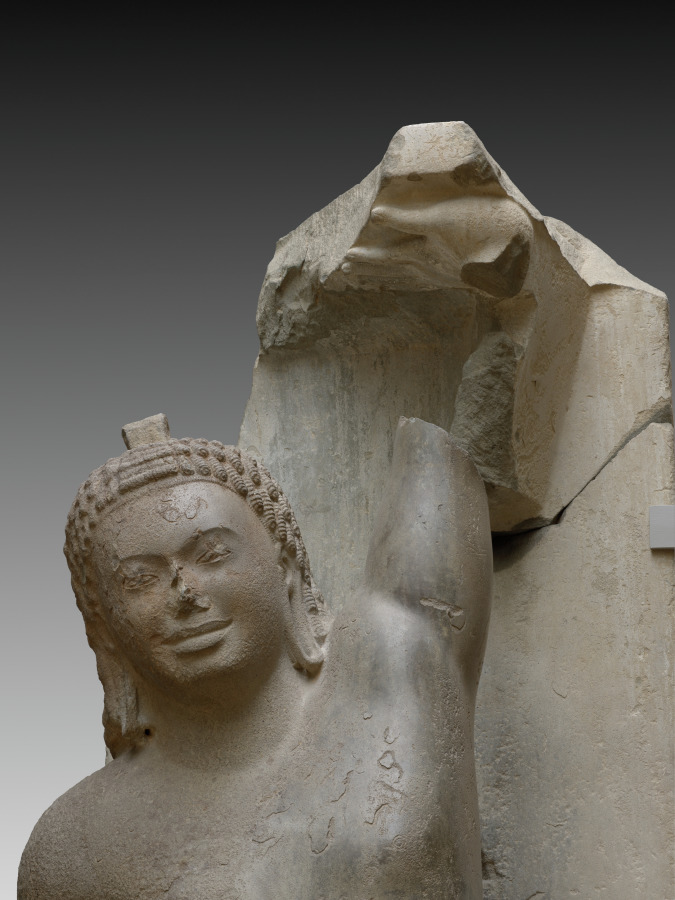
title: Krishna Lifting Mount Govardhan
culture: Southern Cambodia, Takeo Province, Phnom Da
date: c. 600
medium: Sandstone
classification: Sculpture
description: This masterwork of early Cambodian sculpture shows the Hindu god Krishna effortlessly holding aloft a mountain to protect his fellow villagers and herds from torrential storms sent by a jealous old god. It is one of eight monumental monolithic figures recovered from a two-peaked mountain in the floodplains of the Mekong River delta, on the outskirts of the ancient urban center of Angkor Borei.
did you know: Gold earrings were once fastened to the sculpture using holes in the figure's earlobes.